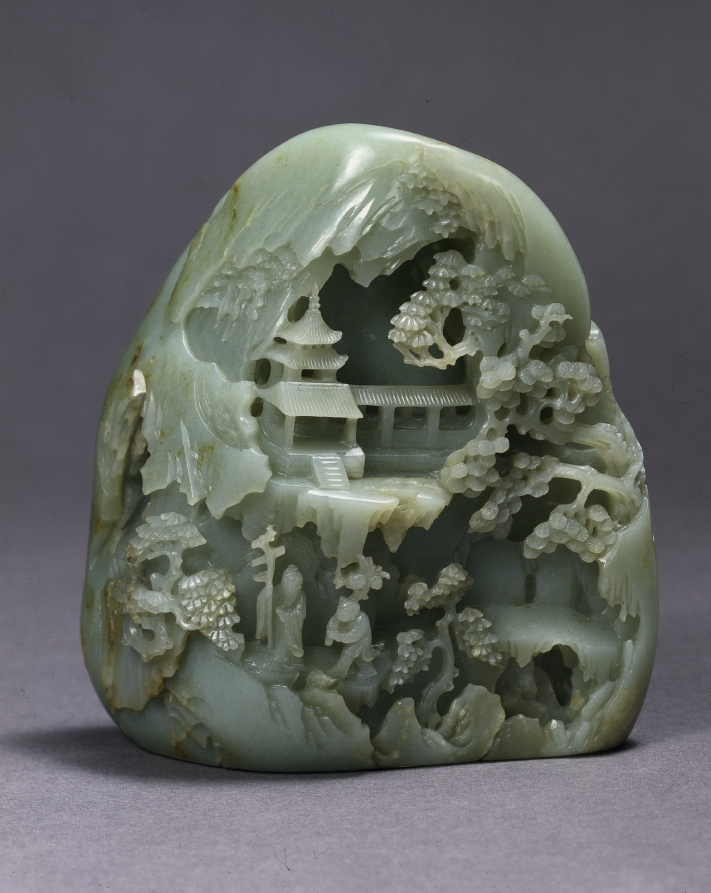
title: Miniature Mountain with Daoist Paradise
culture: China, Qing dynasty (1644–1911), Qianlong reign (1736–95)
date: 1736–95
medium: green jade with brown markings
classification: Jade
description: Sizable jade boulders of mountainous landscapes were carved to represent the search for the paradise or immortals' dwellings in the mountains. This Daoist theme has fired the Chinese imagination throughout history. Believed to have spiritual and magical properties, jade has long been used in tombs and intended for preserving the corporeal body and the soul in the quest for eternity. It is recorded that Daoist practitioners drank morning dews with scraps of jade as an elixir of immortality.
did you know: The bearded immortal is accompanied by a servant carrying a cluster of peaches, symbols of immortality.